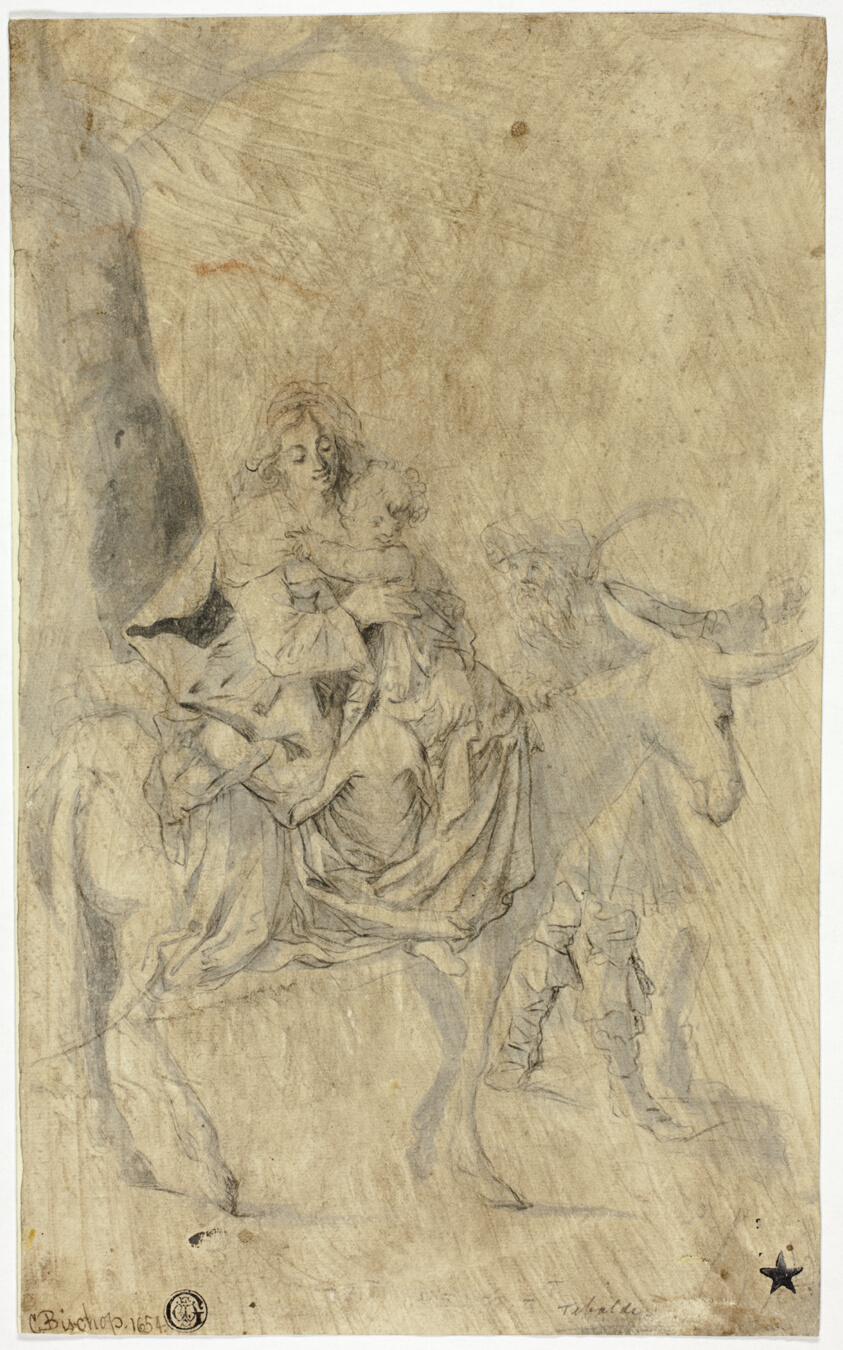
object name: Drawing and Watercolor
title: Flight into Egypt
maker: Attributed to Cornelis Bisschop (Dutch, 1630-1674); or Pellegrino Tibaldi (Italian, 1527-1596)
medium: Black chalk, with brush and gray wash, on brown tinted laid paper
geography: Italy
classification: drawings (visual works); chalk; brush and wash; paper; prints and drawing